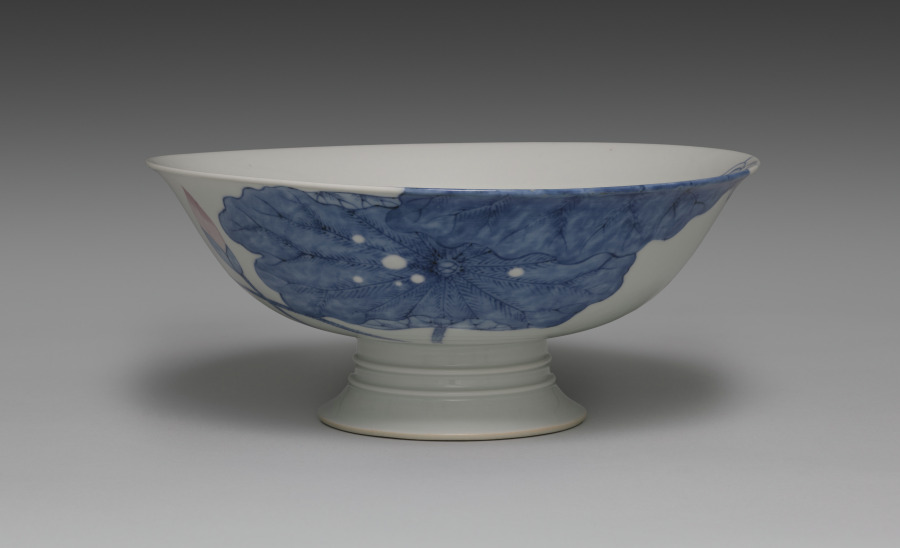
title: High-Footed Bowl with Lotus Pond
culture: Japan, Meiji period (1868–1912)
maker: Seifū Yohei III (Japanese, 1851–1914)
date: 1887–92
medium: Porcelain with underglaze color and modeled designs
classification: Ceramic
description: Seifū Yohei III was the most prominent head of a ceramics studio in Kyoto that specialized in Chinese-style porcelains and especially items for use in sencha (煎茶), or the drinking of steeped-leaf tea with companions. Sencha was popular among the bunjin of Kyoto and Osaka, who often enjoyed it as part of their emulation of Chinese culture. While sencha was by design less formal than the Japanese tea ceremony, it still featured the display of treasured objects. Prized Chinese antiquities were generally unobtainable, so substitutes such as the Gu-Shaped Flower Vase, CMA 2022.224, were much in demand. Bowls for distributing sweets, like this one, were also a staple of sencha gatherings.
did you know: This high-footed bowl simulates exploration of a pond both from underwater and from the sky.